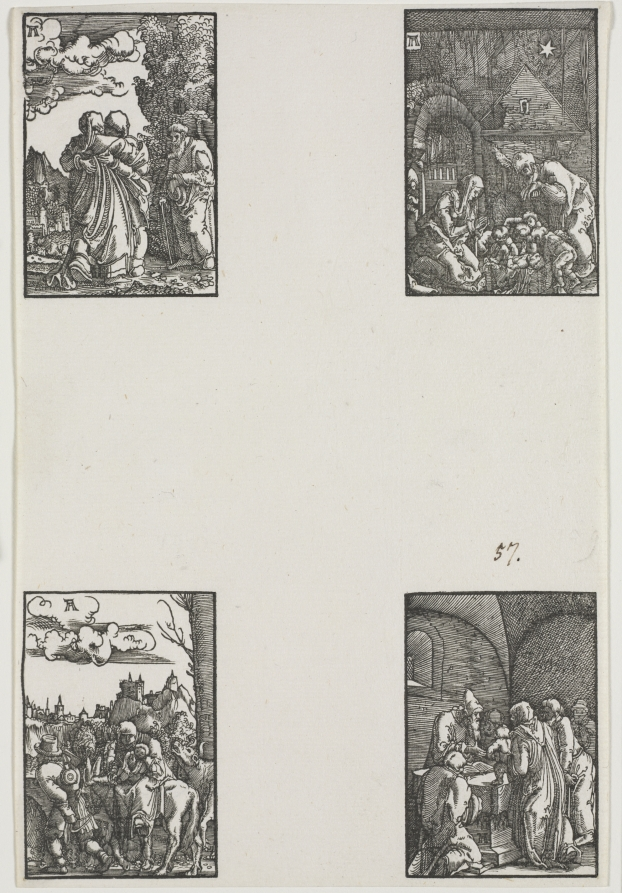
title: The Fall and Redemption of Man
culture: Germany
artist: Albrecht Altdorfer (German, c. 1480–1538)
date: c. 1515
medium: woodcut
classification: Print